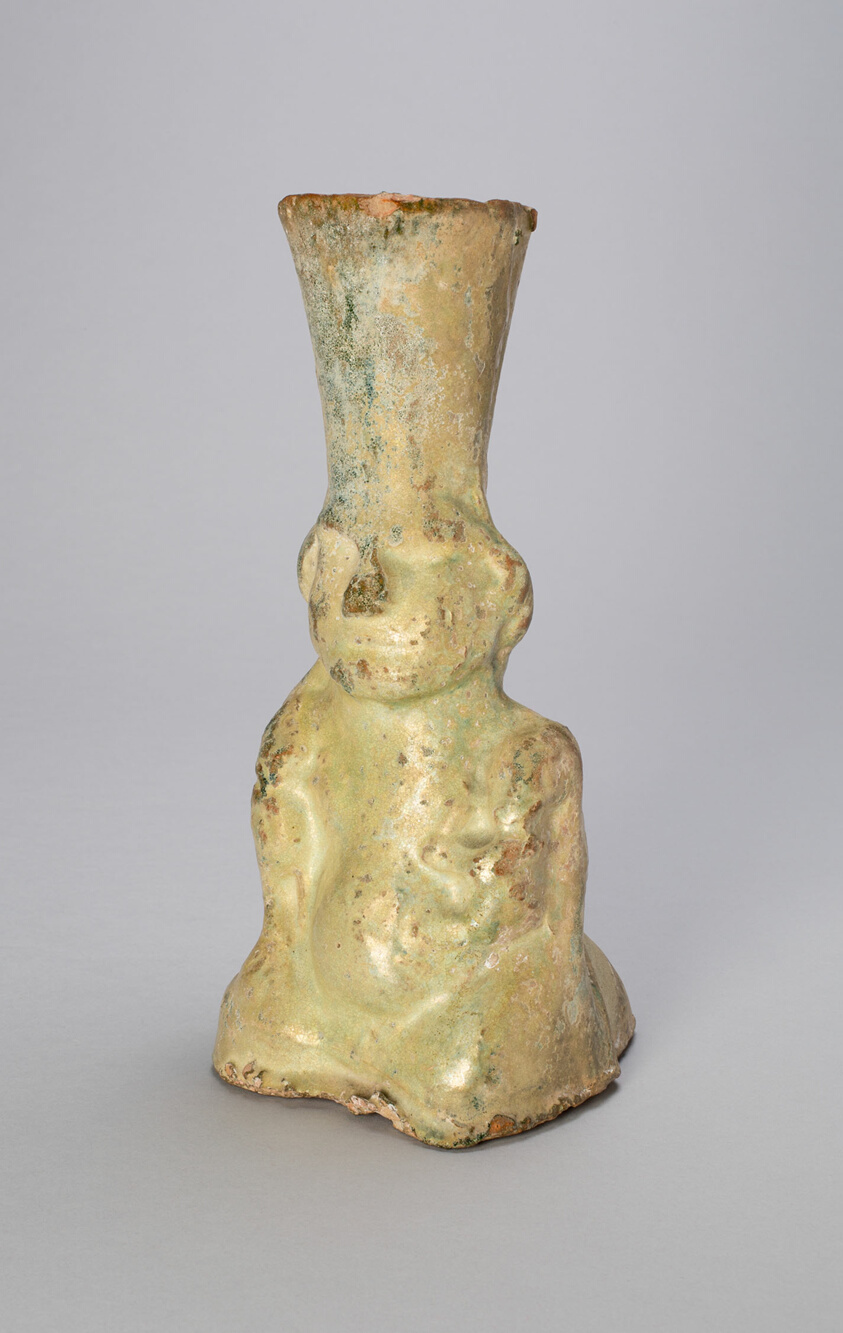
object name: Decorative Arts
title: Lamp of Human Form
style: Chinese (culture or style)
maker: China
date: Eastern Han dynasty (A.D. 25–220)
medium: Earthenware with green lead glaze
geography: China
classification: ceramics; asian art; decorative arts